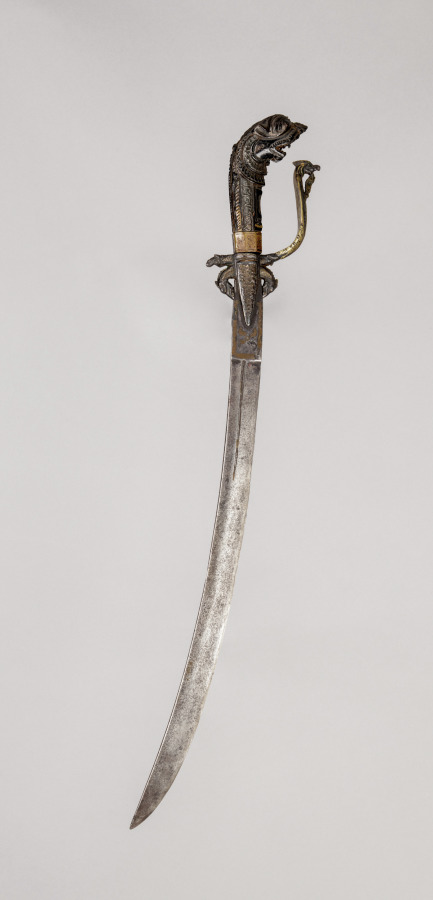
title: Sword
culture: Sri Lanka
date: c. 1800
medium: Blade: steel; hilt: wood with repoussé silver inlay and bronze fittings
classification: Arms and Armor